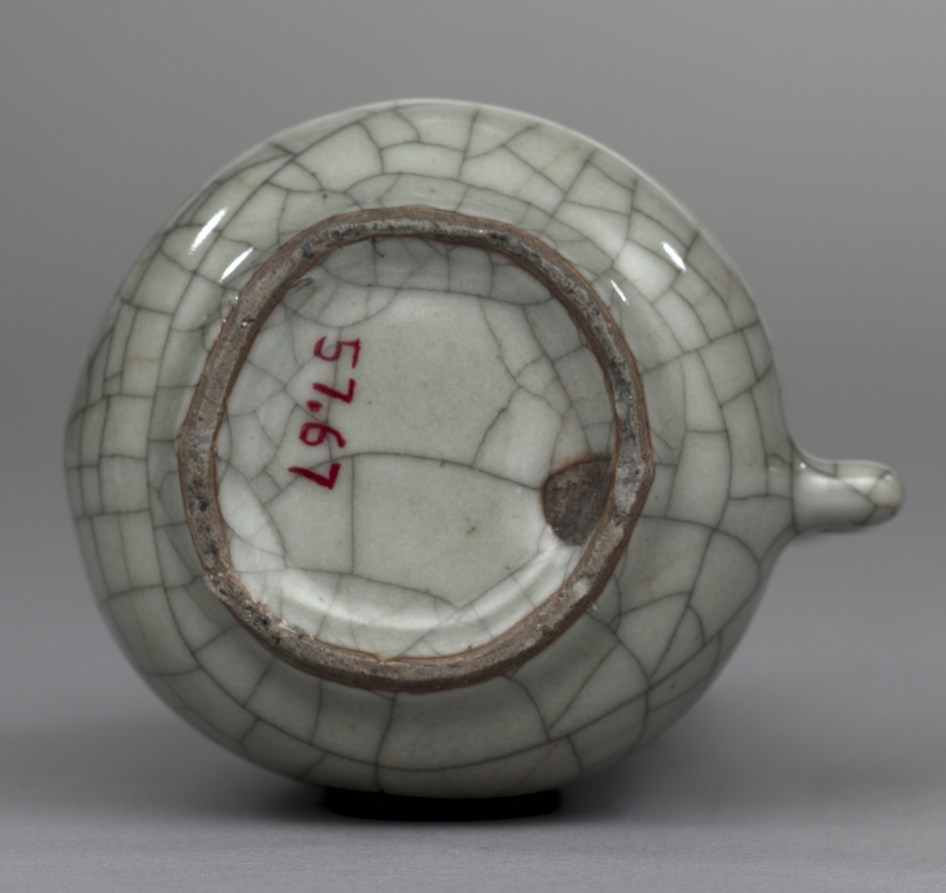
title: Water Flask: Guan ware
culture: China, Yuan dynasty (1271-1368)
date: 1271–1368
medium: glazed stoneware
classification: Ceramic